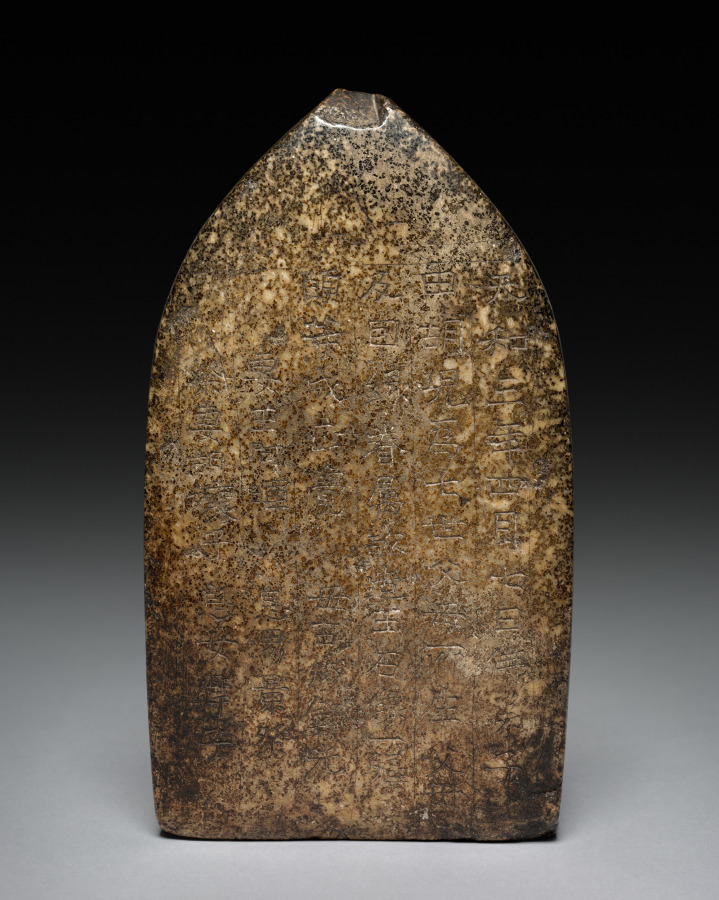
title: Buddha Triad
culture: China, Northern Dynasties period (386–581 CE), Northern Zhou (557-581)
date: 568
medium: stone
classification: Sculpture